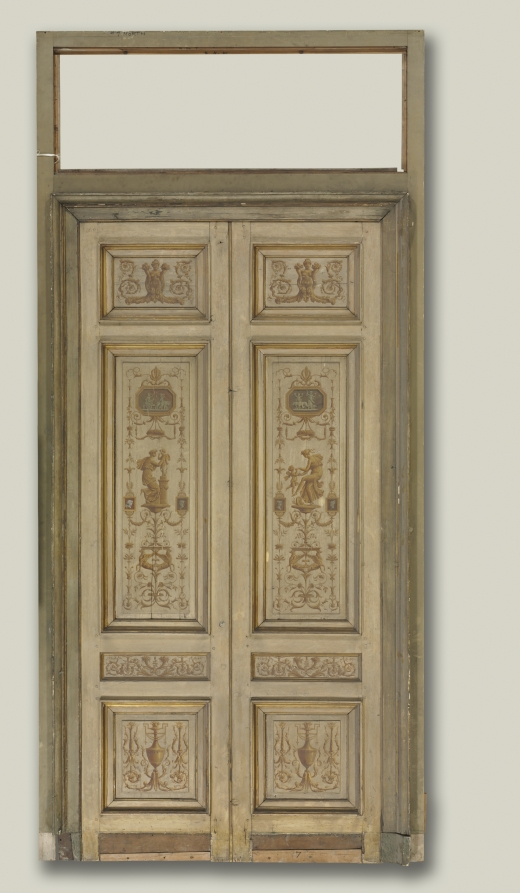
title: Double-Leaf Doors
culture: France, 18th century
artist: Pierre Rousseau (French, 1751–1829)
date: 1790s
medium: oil on wood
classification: Painting